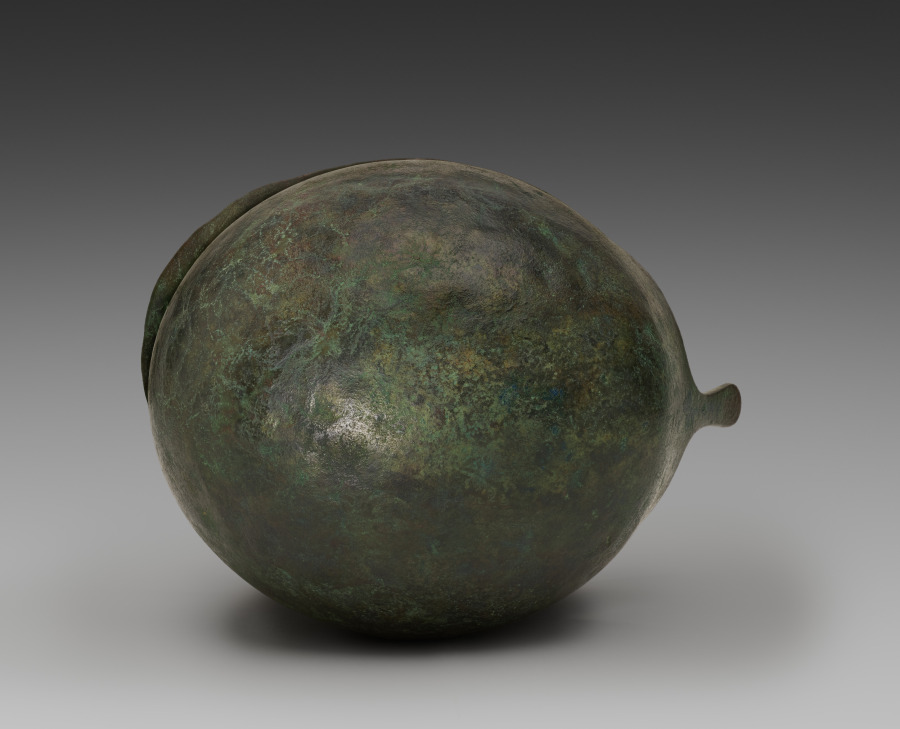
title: Corinthian Helmet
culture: Greek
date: c. 625–550 BCE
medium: Bronze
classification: Arms and Armor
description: This remarkably well-preserved bronze helmet belongs to an iconic type known as Corinthian yet produced far beyond the city of Corinth. Designed for use by hoplite warriors, who fought with spears and shields in shoulder-to-shoulder (phalanx) formation, such helmets provide maximum protection but limited vision, hearing, and movement. Probably first cast and then hammered into its final shape, the helmet features both gentle curves and sharp angles, evoking the head and face that it protected. Similar helmets appear frequently on warriors shown in ancient art, though often with crests of horsehair or other organic materials that no longer survive.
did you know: A small hole above the rear neckline, now repaired, may reflect a fatal blow.